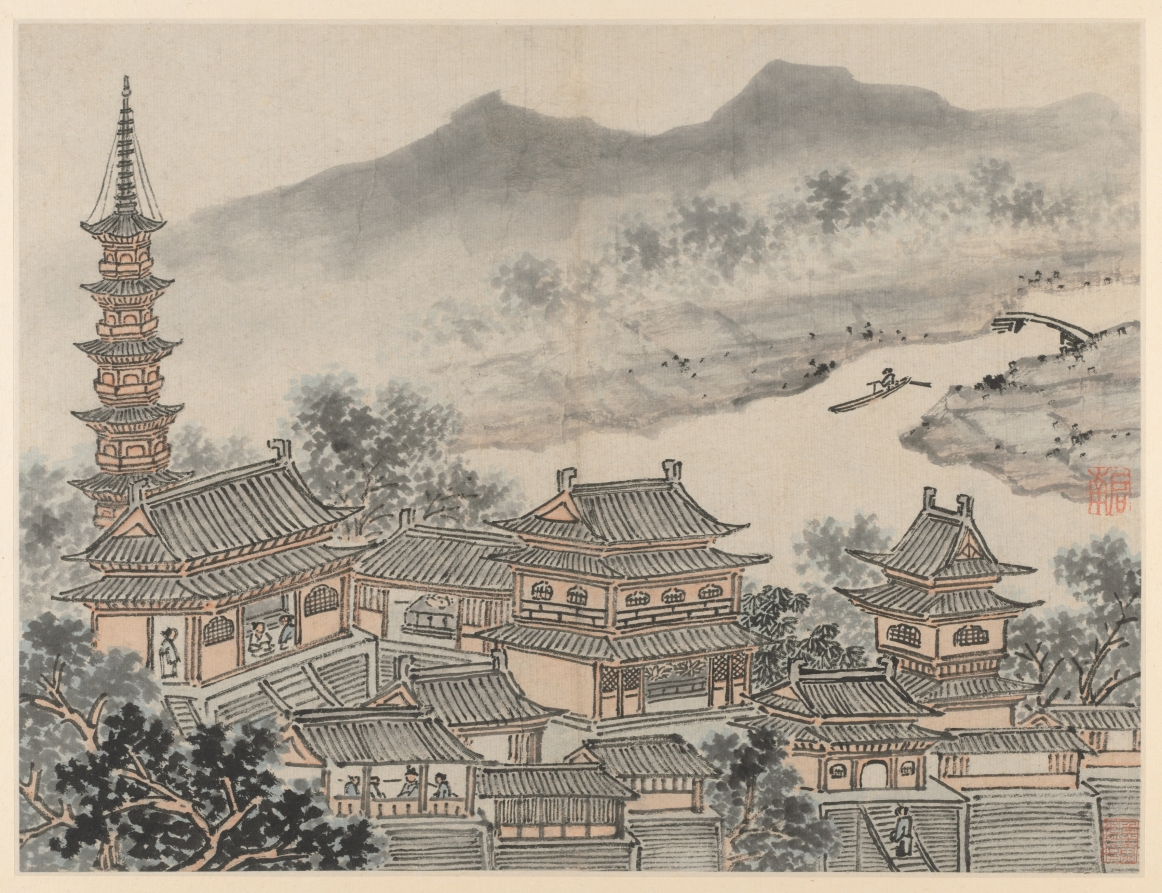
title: The Thousand Buddha Hall and the Pagoda of the "Cloudy Cliff" Monastery, from Twelve Views of Tiger Hill, Suzhou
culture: China, Ming dynasty (1368–1644)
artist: Shen Zhou (Chinese, 1427–1509)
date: after 1490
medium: Album leaf; ink on paper or ink and slight color on paper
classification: Painting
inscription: [印] 启南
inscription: seal of Hou Shigong 侯士恭 [late 19th–early 20th century]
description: Views of Tiger Hill depicts a historic site a few miles northwest of Suzhou. The scenes simulate a visit from arriving by boat at the foot of the mountain to climbing to Cloudy Cliff Monastery. Representations of the artist’s mature style, Shen Zhou included views in subtle colors in the suite of monochrome scenes. A Suzhou native, Shen Zhou was supported by family wealth and rejected an official career in favor of life as a retired scholar. Turning to painting in midlife, he is regarded as the founder of the Wu School of painting, with its center in Suzhou.